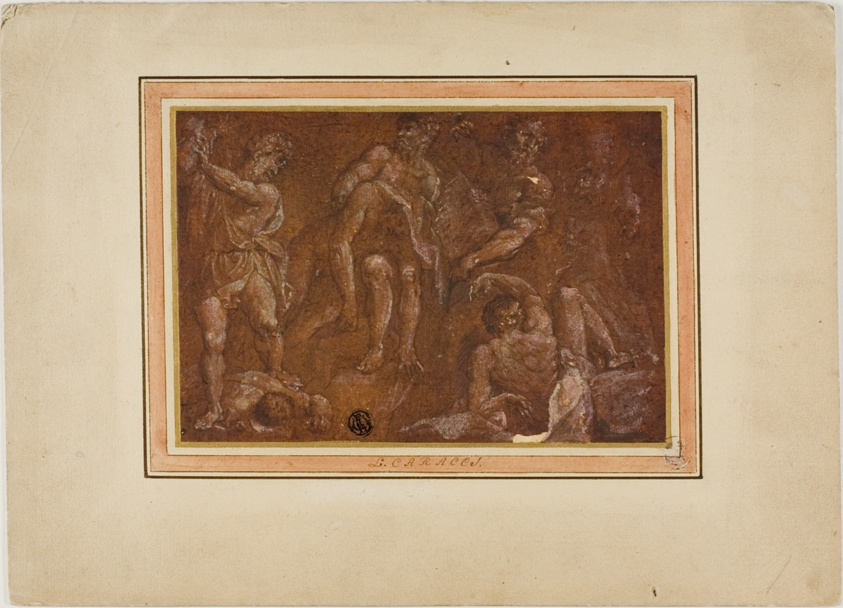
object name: Drawing and Watercolor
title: Bacchanalian Scene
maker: Attributed to Eduard DuBois (Flemish, 1619-1697); or Amico Aspertini (Italian, c. 1475-1552); or Lodovico Carracci (Italian, 1555-1619); or Joachim von Sandrart, I (German, 1606-1688)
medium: Pen and brown ink, heightened with pink and white gouache, on red-brown prepared ground on laid paper, laid down on cream card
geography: Flanders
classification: drawings (visual works); prints and drawing